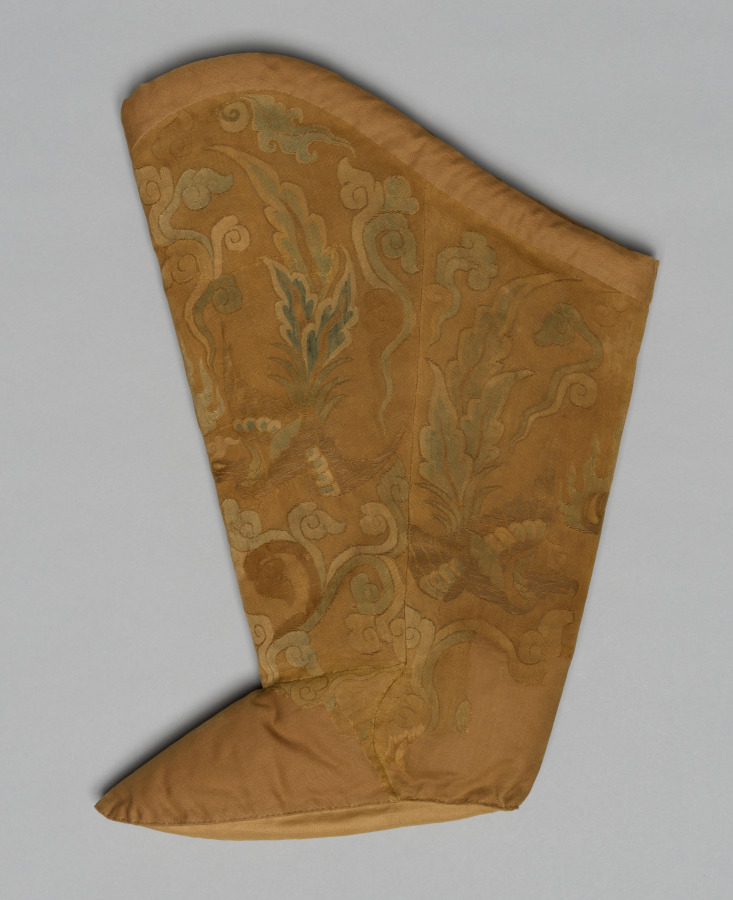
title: Boot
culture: Northern China, Liao dynasty (907-1125)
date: 907–1125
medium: Silk: tapestry weave; two kinds of metal threads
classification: Textile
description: The kesi outer fabric of the boots is woven with pairs of phoenixes chasing a flaming pearl among clouds. The sections were carefully cut so that the flaming pearl occurs at the centers of the shin and calf, and at the top of the instep. To accommodate the particular cut and smaller area of the instep, the phoenixes were depicted slightly differently and the design was reduced in scale. The wide cut of the top of the boots enabled pants to be tucked inside. Skirts, jackets, robes, gloves, and a hat would have completed the outfit. Liao kesi is distinguished by its exceptional refinement. Considered a national specialty, it was used extensively for both clothing and furnishings. Not only were kesi robes worn by the Liao emperor, but they were sent to the Song emperor as imperial gifts.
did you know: The once lavish use of gold and the Chinese-inspired phoenix motif suggest that the boots were made for a member of the Liao imperial family, probably a woman.